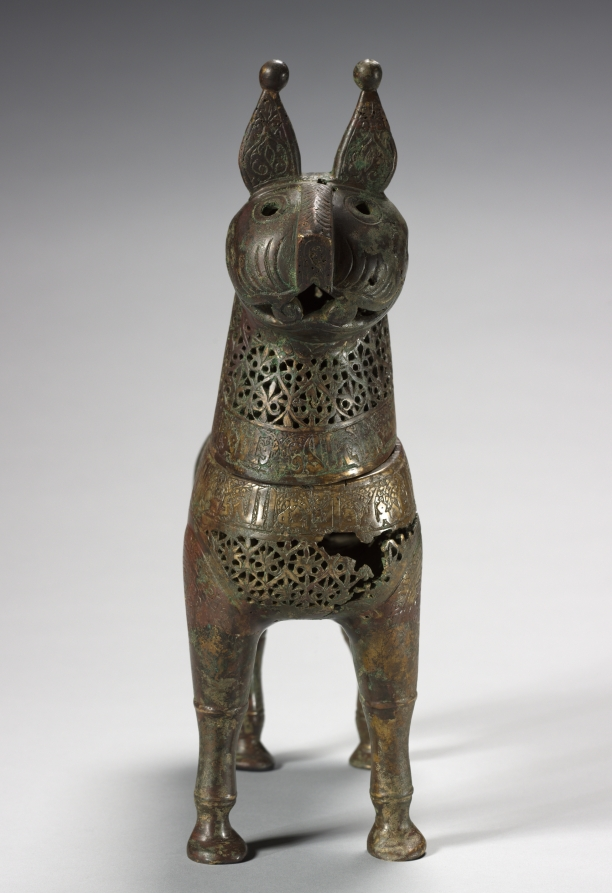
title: Feline Incense Burner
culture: Iran, Khurasan, Seljuq period of Iran (1037–1194)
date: 1150–1200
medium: Copper alloy, cast, engraved, chased, and pierced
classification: Metalwork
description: In Iran during the 1000s and 1100s, vessels in the shape of animals gained popularity, especially as incense burners. Felines were favored in Persian art and this piece may represent a caracal, a type of lynx. The head of the creature was cast separately and is removable to fill its body with hot coals and incense. Qur’anic verses on the neck and spine remind worshippers to set work aside, attend prayer, and then disperse to seek God’s bounty. The diffusion of perfumed smoke through the burner’s pierced palmette design may have served as a sensorial reminder of this teaching.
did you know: Arabic inscriptions in Kufic script against a background of scrolling arabesques run along the back and neck of the feline form.